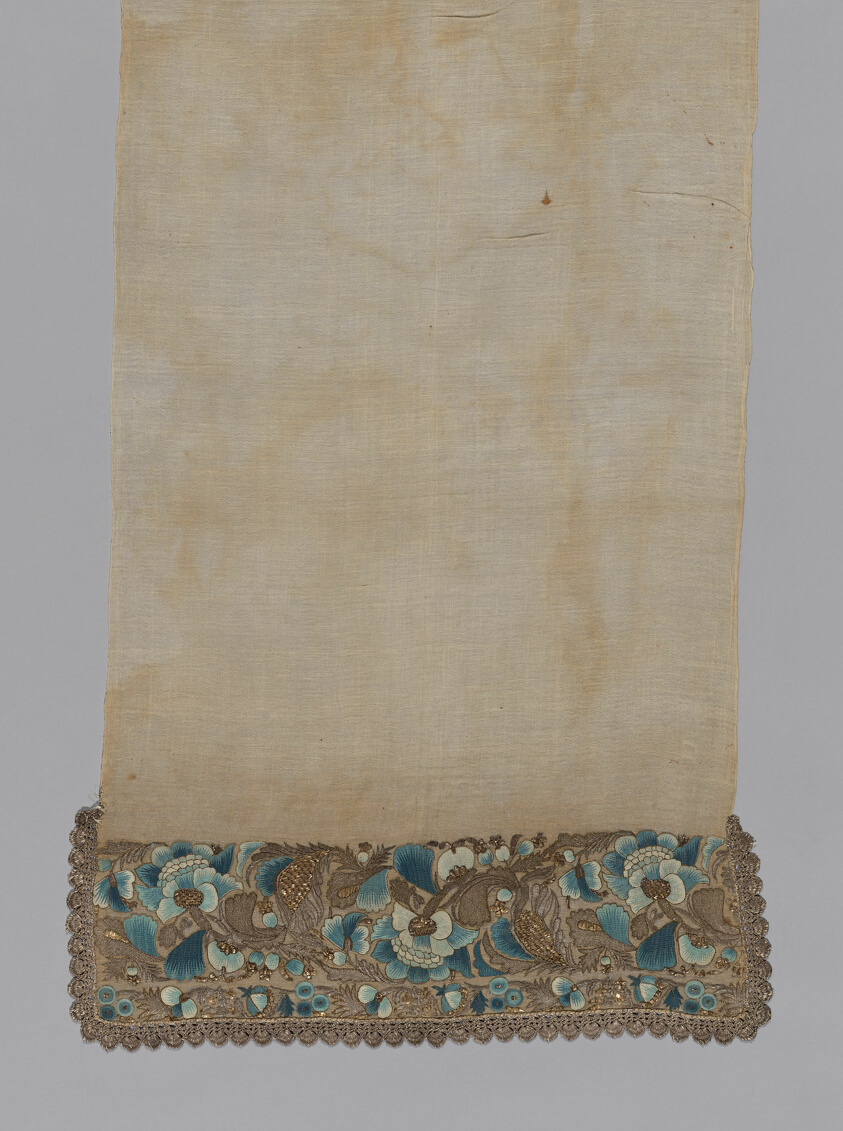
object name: Textile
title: Towel or Napkin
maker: Turkey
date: 19th century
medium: Embroidered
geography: Turkey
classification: textile; needlework (visual works); weaving